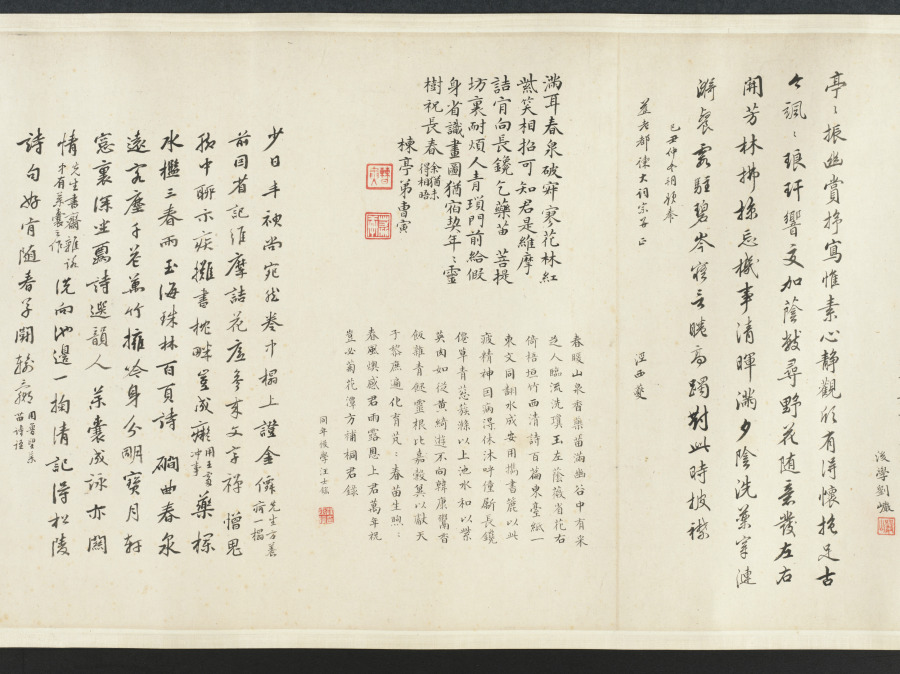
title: Cleansing Medicinal Herbs in the Stream on a Spring Day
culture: China, Qing dynasty (1644-1911)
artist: Yu Zhiding (Chinese, 1647–c. 1716)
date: 1703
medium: Handscroll; ink and color on silk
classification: Painting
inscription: Title by Chen Yixi.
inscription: 姑射仙人冰雪膚，新詩傳唱滿通都。/ 極知遲暮難為別，更展春泉洗藥圖。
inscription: Colophon by Chen Tingjing 陳廷敬 (1639–1712). Colophon by Wang Hongxu 王鴻緒 (1645–1723), dated 1707. Colophon by Song Luo 宋犖 (1634–1714). Colophon by Liu Yan 劉巗. Colophon by Jing Xikui 涇西夔. Colophon by Liu Yan 劉巗. Colophon by Cao Yin 曹寅. Colophon by Wang Shihong 汪士鋐. Colophon by Wang Shidan 王式丹 (1645–1718), dated 1712. Colophon by Shi Shenyi 史申義 (1661–1712), dated 1712. Colophon by Yin Yuqing 殷餘慶, dated 1712.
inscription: Colophon by Chen Shixia 陳時夏, dated 1729.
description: A famous portraitist, Yu Zhiding here depicts the likeness of Shi Shenyi 史申義 (1661–1712), an official and poet. Master Shi, a sickly man, was deeply interested in medicinal science. The opening section of the scroll features a boy washing a fungus in fresh spring water, a basket of medicinal herbs by his side. Other servants carry a fan, a bundle of scrolls, and a cup of tea or hot wine. Master Shi sits in a bamboo grove, surrounded by fields of herbs. Returning swallows, pink peach blossoms, and blooming magnolia indicate spring, whereas the fungus conveys wishes for long life. The spring theme may express the artist’s wish for his friend’s recovery.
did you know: In the pavilion are some of Shi Shenyi’s scholarly accoutrements: a stack of books, an antique zun 尊 (wine vessel), a brush holder, an ink stone, and a small chime.